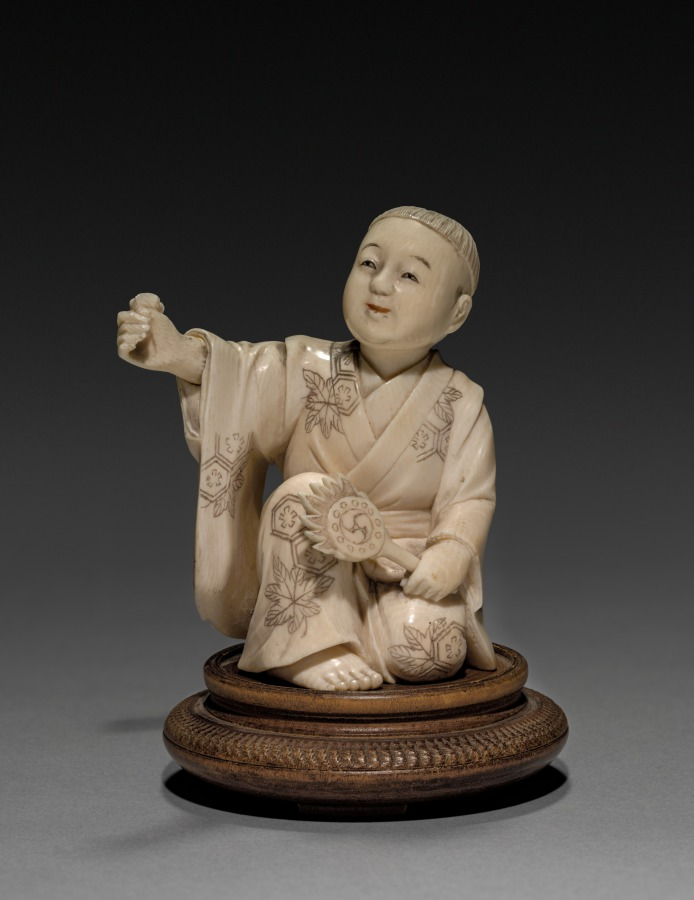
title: Kneeling Boy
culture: Japan, Meiji period (1868–1912)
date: early 1900s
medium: ivory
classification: Ivory